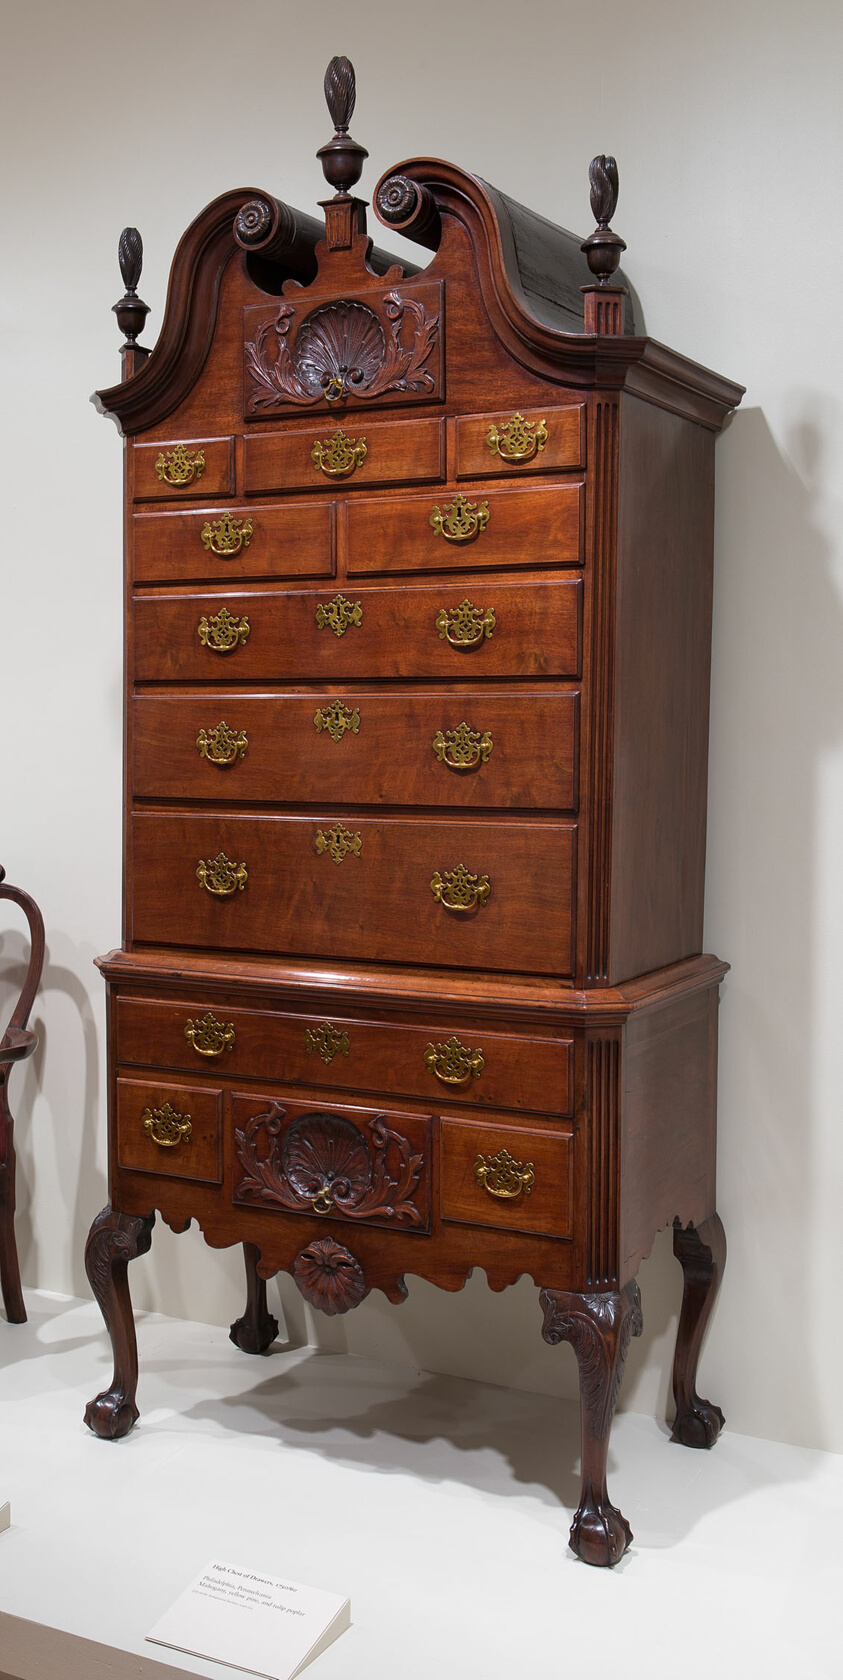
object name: Furniture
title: High Chest of Drawers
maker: Artist unknown (American, 18th century); Philadelphia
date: 1750–60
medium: Mahogany, yellow pine, and tulip poplar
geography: Philadelphia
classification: case furniture; furniture; american decorative arts; american arts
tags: furniture